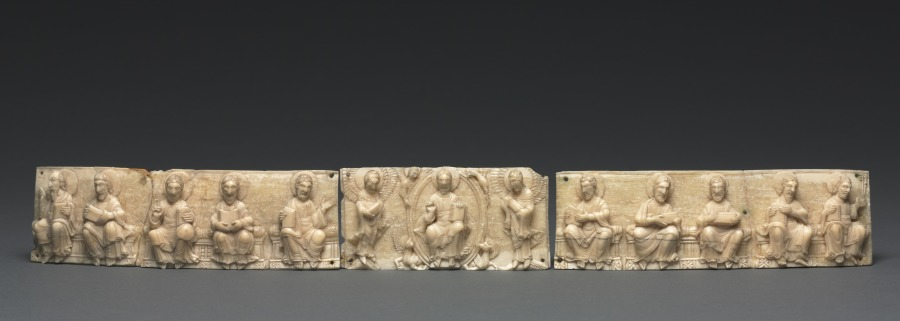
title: Plaque from a Portable Altar: Christ and the Apostles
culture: Germany, Lower Rhine Valley, Romanesque period, 11th century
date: 1050–1100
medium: walrus ivory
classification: Ivory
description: These intricately carved ivory panels once decorated the sides of a portable altar. Three of the plaques, those depicting Christ in Majesty and his apostles, were the first major acquisition of William M. Milliken, the museum's first curator of decorative arts and later director (1930–1958). As Milliken later recalled, the pieces "were immensely intriguing, monumental in scale, even if tiny in size, the Christ in the mandorla could have been enlarged and would have graced the tympanum of a great cathedral."